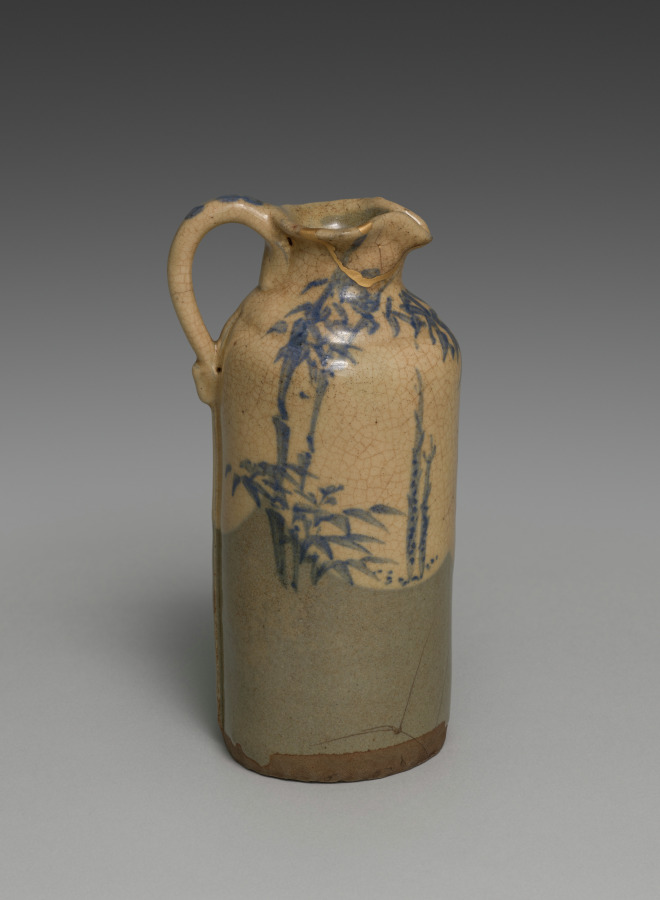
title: Sake Pourer with Bamboo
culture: Japan, Edo period (1615–1868)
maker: attributed to Seifū Yohei I (Japanese, 1801–1861)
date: c. 1844–57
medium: one of a pair of sake flasks; stoneware with white slip, underglaze blue and gold repair (kintsugi) (Kyoto ware)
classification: Ceramic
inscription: The storage box for the pair of vessels is inscribed and impressed with seals.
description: This pair of sake pourers adorned with with bamboo and bellflowers is attributed to the founder of the Seifū Studio, Seifū Yohei I (1801–1861). Yohei I, the lineage founder, was born to the Yasuda family in the city of Kanazawa, which faces the Sea of Japan. His home province of Kaga (in present-day Ishikawa Prefecture) produced its own ceramics, known as Kutani ware, but for his training as a potter, Yohei I chose Kyoto, which produced the more technically advanced porcelainware. He moved to Kyoto around the 1820s and became apprenticed to Nin’ami Dohachi, a leading potter in the city. He later struck out on his own, and it is likely that his teacher gave him the name Seifu Yohei. His works include many exquisitely painted copies of Chinese porcelain, and he also produced stoneware with overglaze color enamels that emulated works in the style of Ogata Kenzan (1663–1743) at which his teacher excelled.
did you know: Sake may be served heated or chilled, and, as with wine, the recommended serving temperature of sake varies greatly by type.